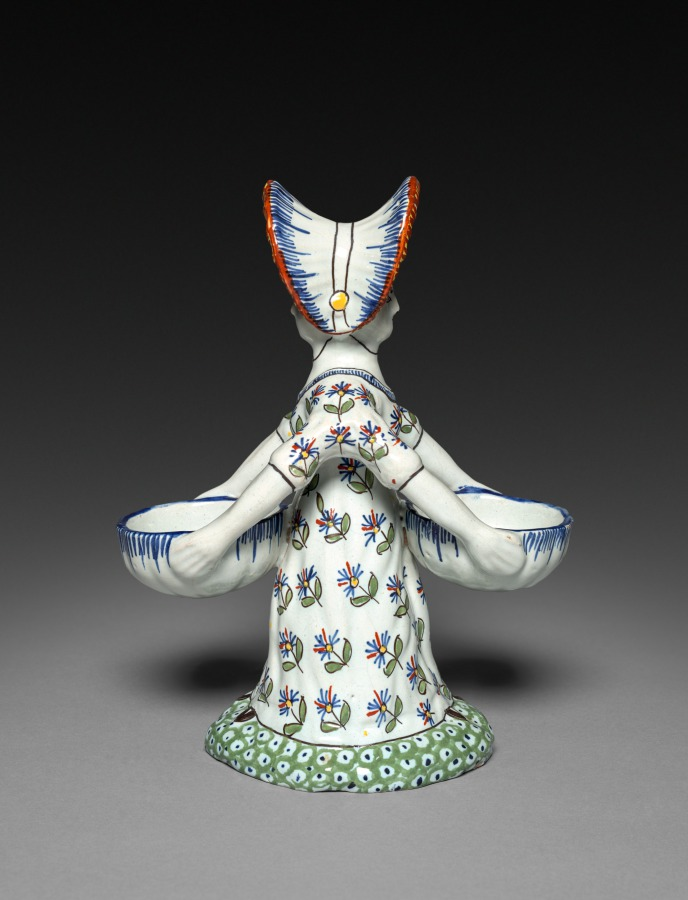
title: Double-faced Figure of a Woman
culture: France, Clermont-Ferrand, 18th century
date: 1792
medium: faience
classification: Ceramic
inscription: at bottom of skirt on outside in black: "1792."